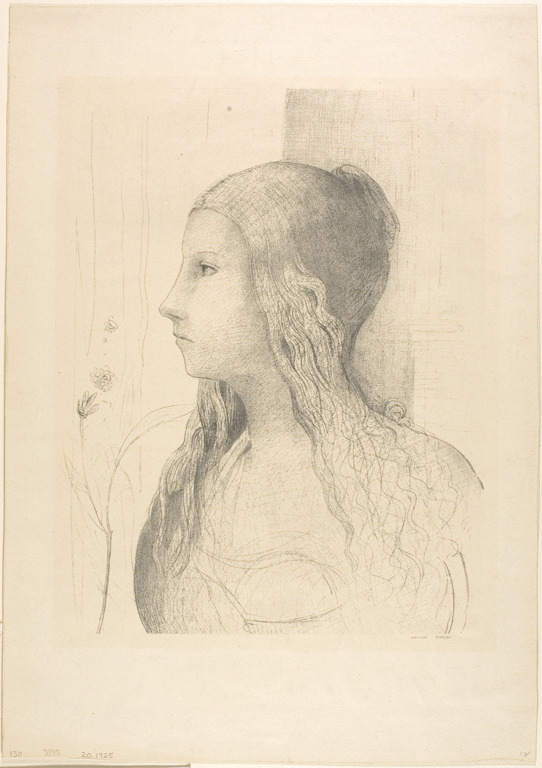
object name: Print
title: Brünnhilde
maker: Odilon Redon (French, 1840-1916)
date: 1894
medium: Lithograph in black on heavy cream wove paper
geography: France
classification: lithograph; print; prints and drawing; paper